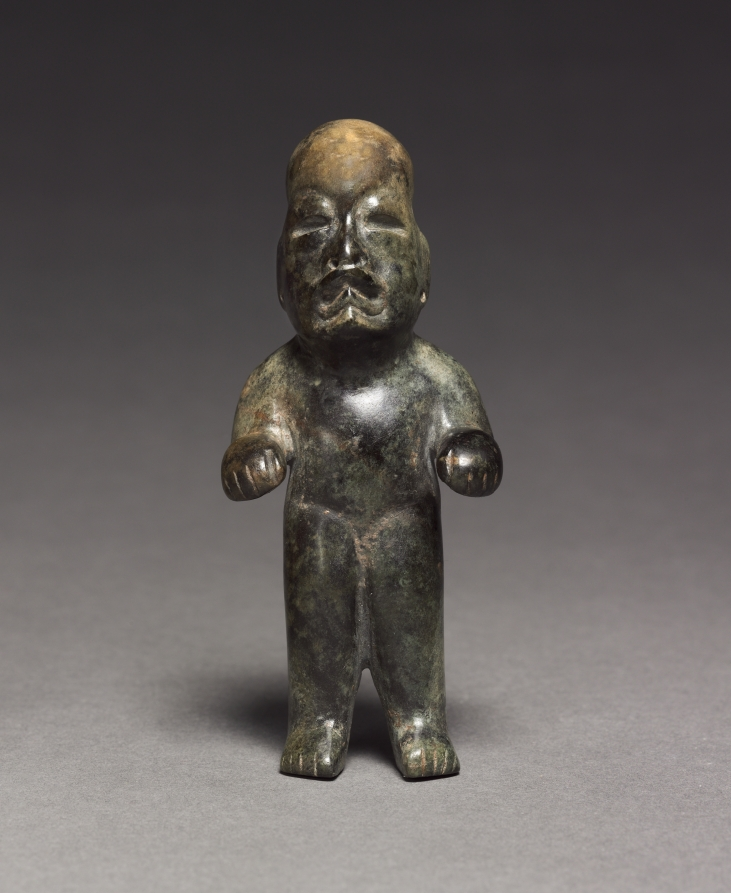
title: Standing Figure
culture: Mesoamerica, Mexico, Olmec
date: c. 900–400 BCE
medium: serpentine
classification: Sculpture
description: The Olmec were Mesoamerica's greatest lapidaries; their work in jade and serpentine was prized by both contemporary and later Mesoamerican cultures. Human beings were jaguar traits (such as the downturned mouth and paw-like hands of this figurine) are common in Olmec art. Such creatures were probably believed to possess supernatural powers.